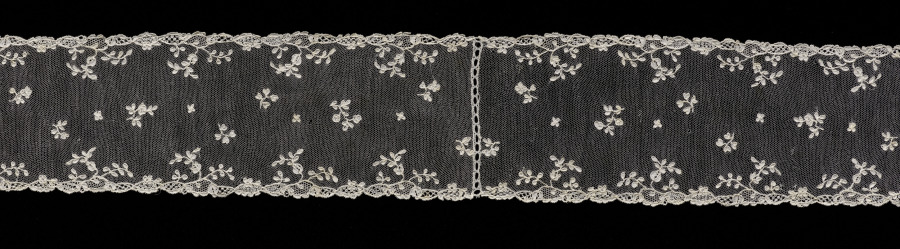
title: Pair of Lace Lappets, joined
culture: France, Alençon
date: 1774–92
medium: Linen: needle lace (Point d'Alençon)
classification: Lace